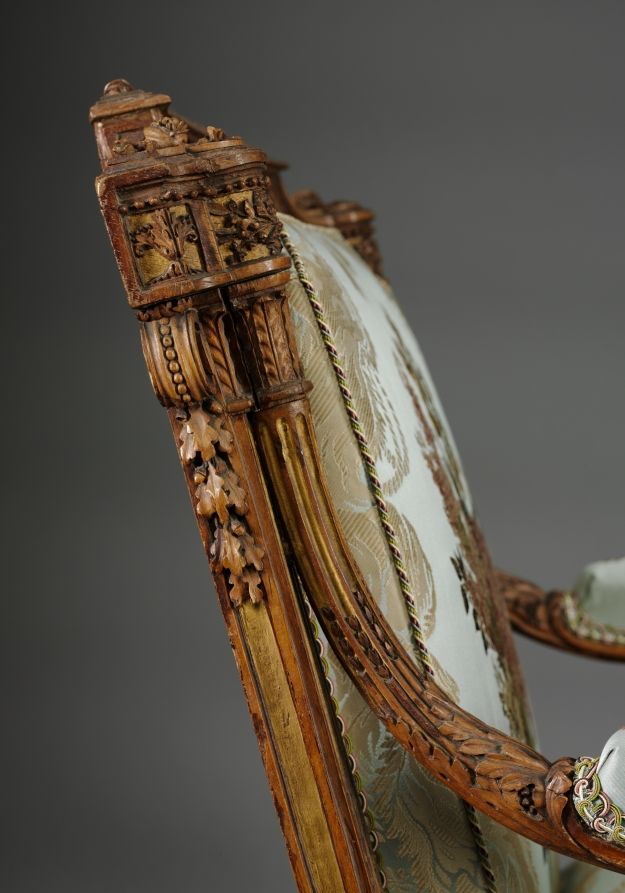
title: Armchair (Fauteuil) (1 of 2)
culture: France, 18th century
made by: Nicolas-Denis Delaisement (French)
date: c. 1785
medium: boxwood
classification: Furniture and woodwork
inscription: signed on back of frame of seat underneath: Delaisement with inverted "s."